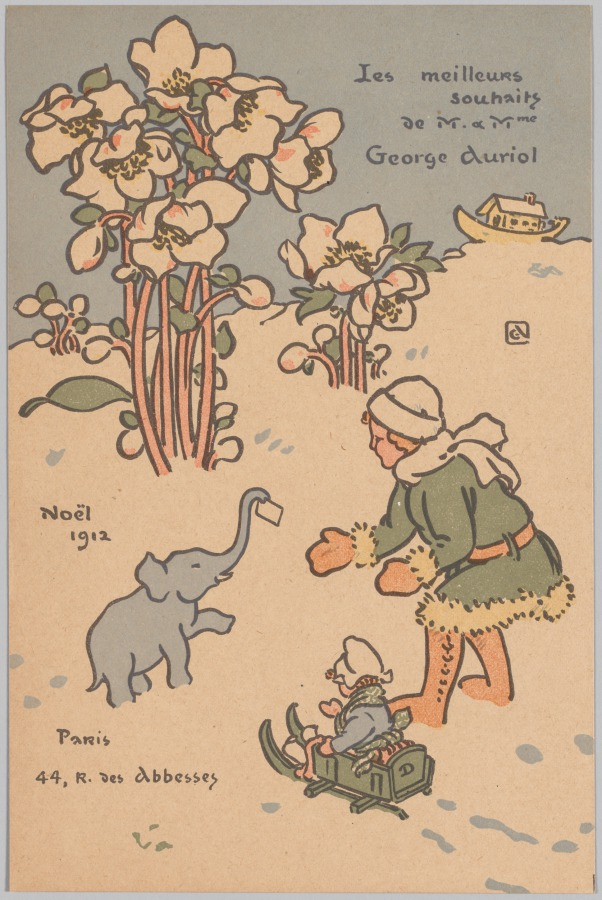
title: Noël (Holiday Card)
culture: France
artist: George Auriol (French, 1863–1938)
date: 1912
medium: color lithograph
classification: Print